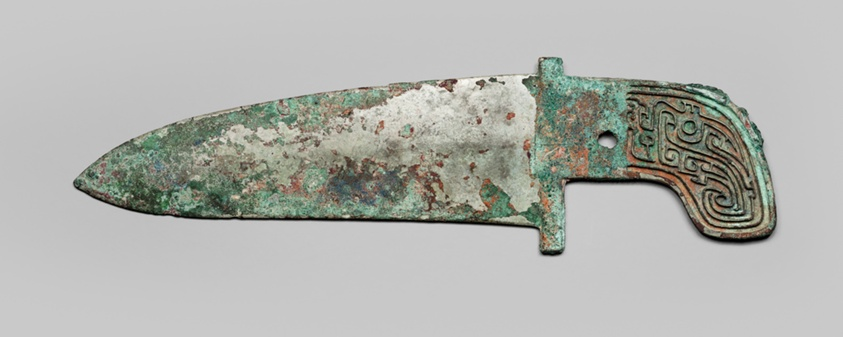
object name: Vessel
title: Dagger-Axe (ge)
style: Chinese (culture or style)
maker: China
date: Shang dynasty (1600 – 1046 B.C.)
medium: Bronze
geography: China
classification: bronze; metal; weapon; asian art; vessel